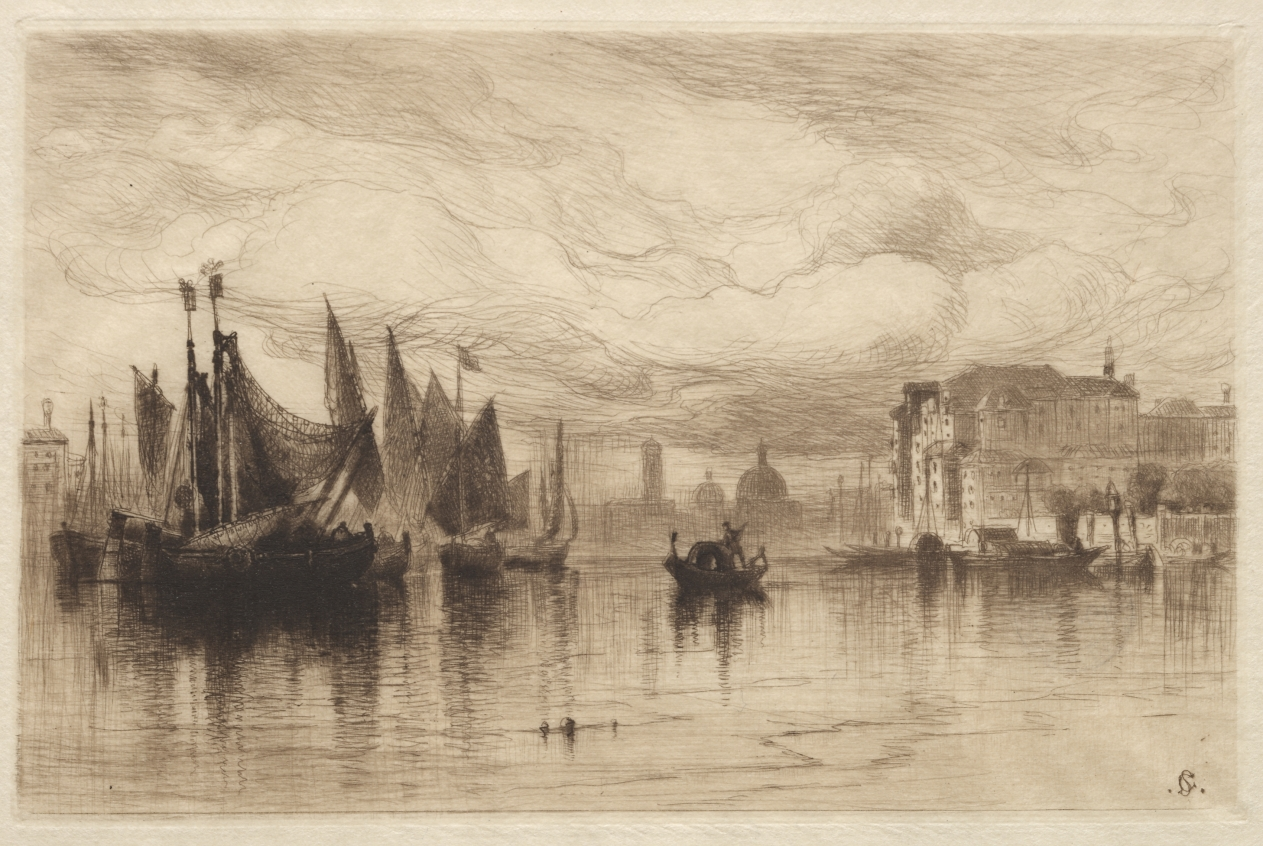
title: A Cloudy Day in Venice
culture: America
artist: Samuel Colman (American, 1832–1920)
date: c. 1881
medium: etching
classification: Print